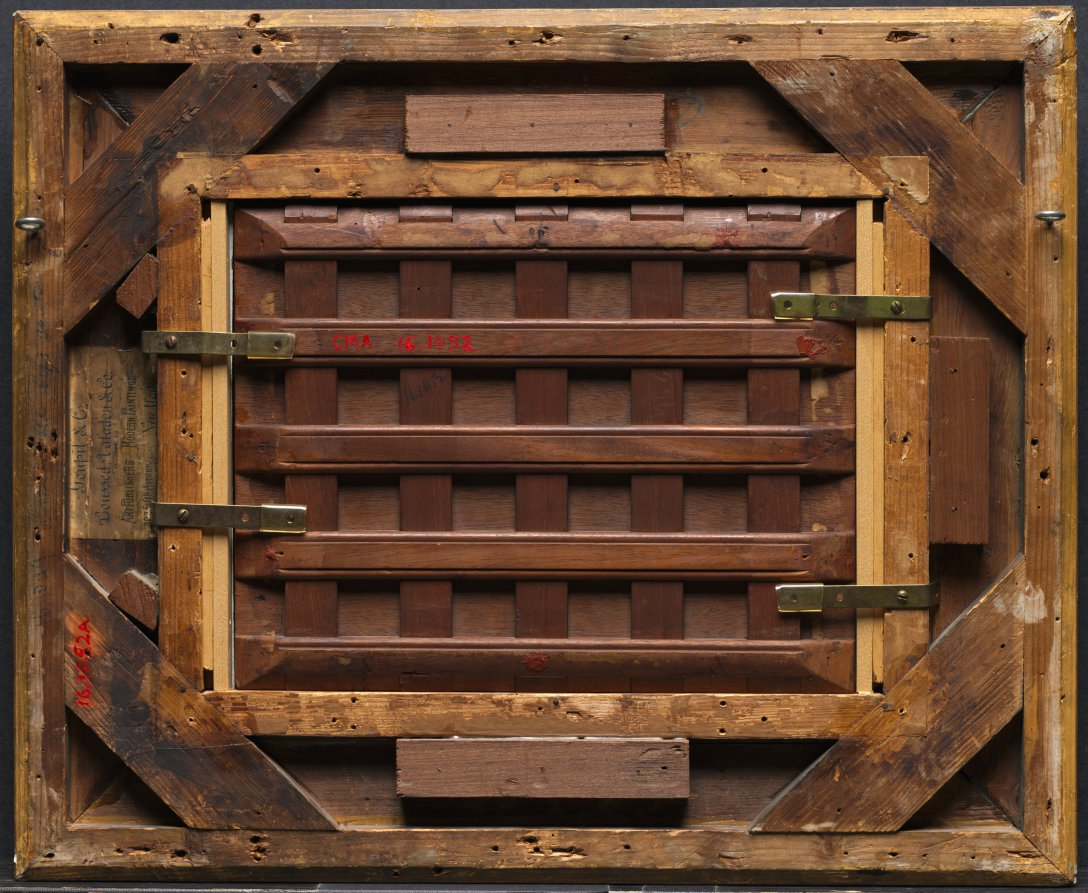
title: The Oak Tree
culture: France, 19th century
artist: imitator of Théodore Rousseau (French, 1812–1867)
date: 19th century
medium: oil on paper mounted on wood panel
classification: Painting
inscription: Signed lower left: TH. Rousseau